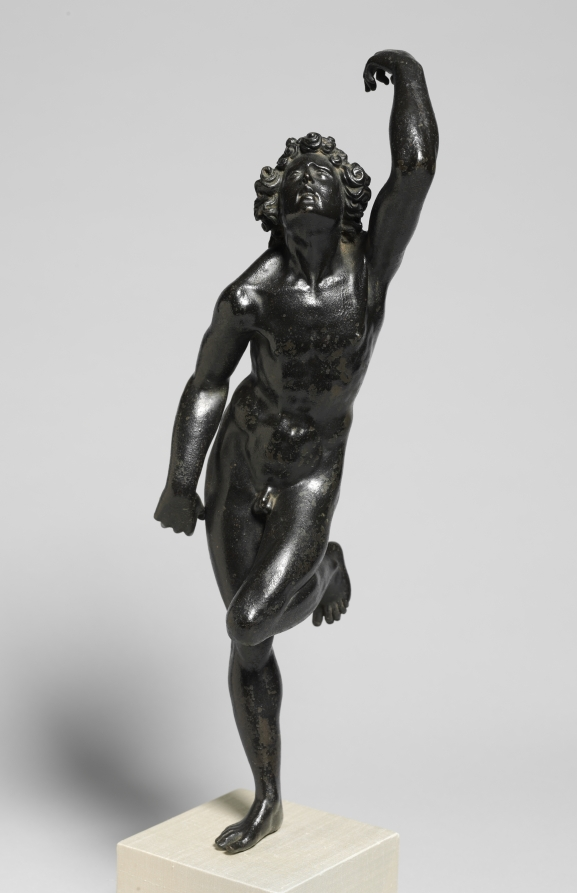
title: Saint Sebastian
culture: Germany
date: 1600s or later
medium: bronze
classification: Sculpture